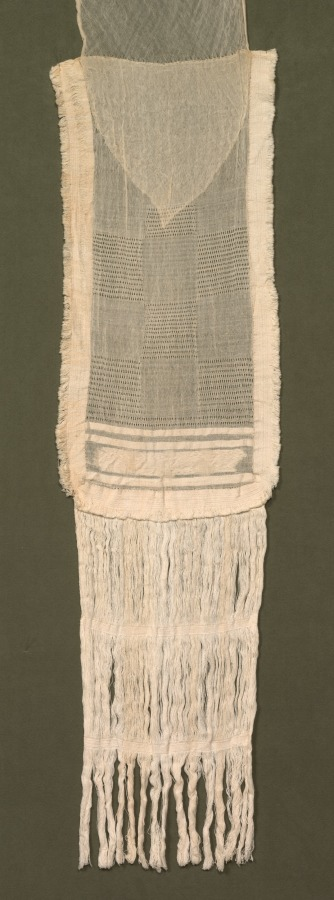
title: Turban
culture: Peru, North Coast, Chimú style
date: 1485–1640 (radiocarbon date, 95.4% probability)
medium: Cotton; plain weave, brocaded and complex alternating gauze with 5 shots of plain weave between gauze shots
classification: Garment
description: Chimú garments like this one consist of a large, rectangular central section—here measuring some 65 inches by 50 inches—with decorated tabs stitched to two opposite corners. Such garments probably were worn as turbans but we do not understand exactly how. For the purpose of display, the plain central section of this example has been folded to form a wide band, with the tabs arranged on either side.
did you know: The white cotton yarns used to make this textile are only 0.1 to 0.2 millimeters in diameter.